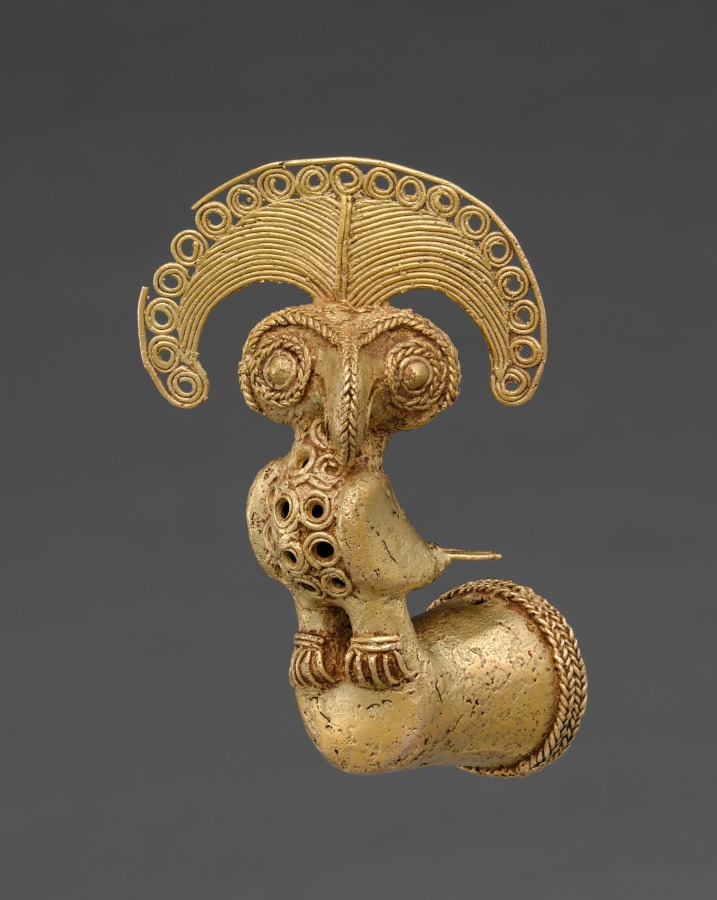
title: Finial with Bird (Harpy Eagle with Royal Flycatcher Crest?)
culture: Isthmian Region (Colombia), Sinú (Zenú), 5th century-11th century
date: 400–1000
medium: gold, cast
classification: Metalwork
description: This gold finial fit over the end of a staff, an emblem of rank. The bird has the hooked beak of a raptor—perhaps the harpy eagle, the “king” of tropical forests. The enormous crest, however, may be inspired by the Royal Flycatcher, a smaller bird that fans its unique, brilliantly colored crest during mating.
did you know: A museum visitor corrected our identification of this bird!